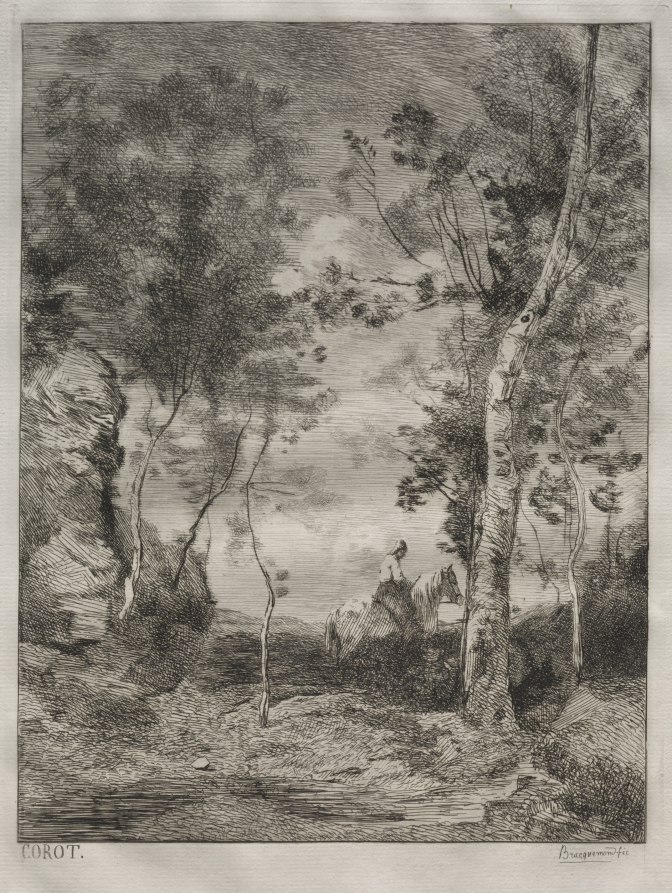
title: Landscape, or The White Horse, after Corot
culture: France, 19th century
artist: Félix Bracquemond (French, 1833–1914)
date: c. 1858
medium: etching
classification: Print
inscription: lower left, in plate: COROT; lower right, in plate: Bracquemond féc.